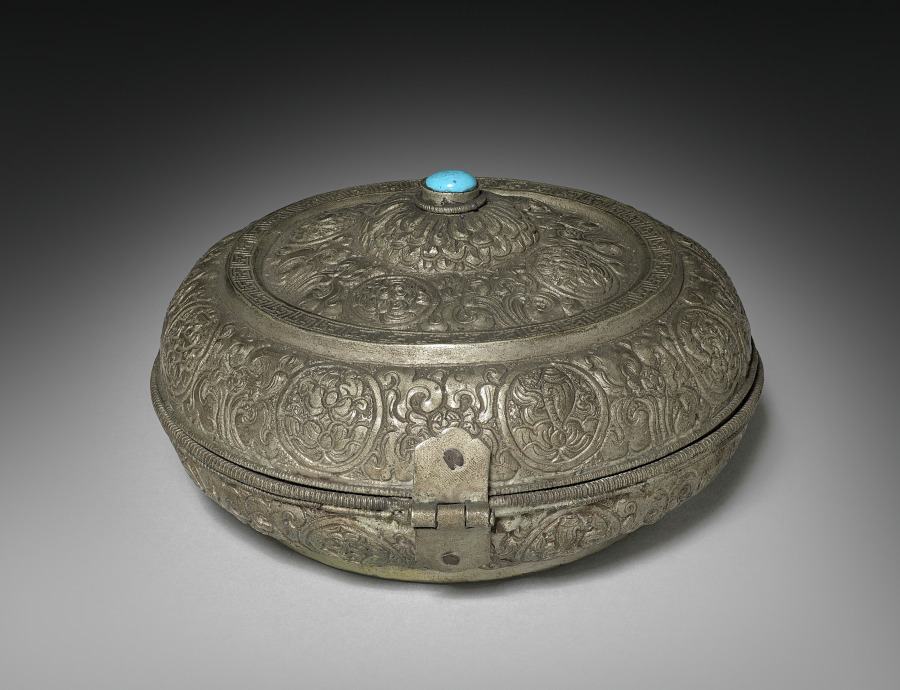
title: Betel Nut Box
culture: Tibet, 19th century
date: 1800s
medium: silver and enamel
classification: Metalwork